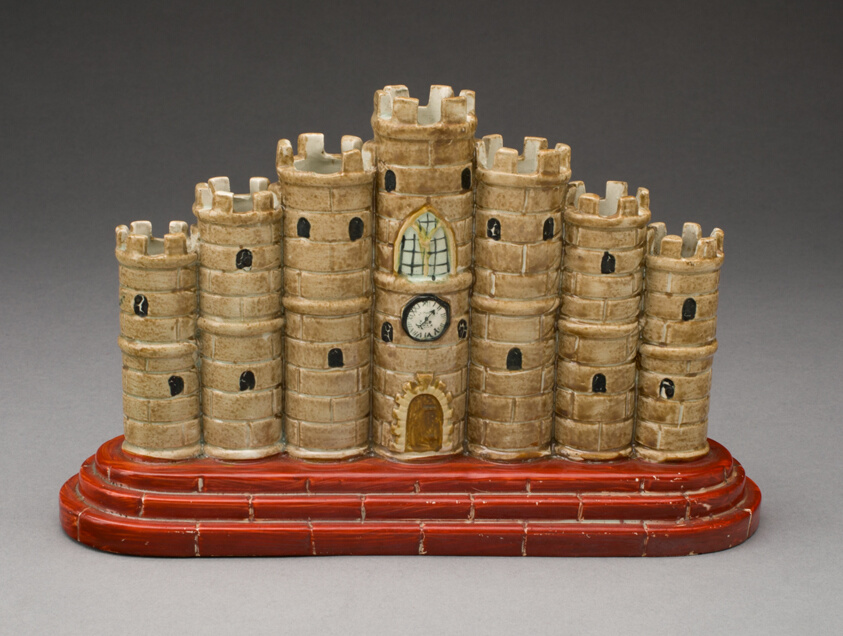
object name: Ceramics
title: Flower Holder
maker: England, Staffordshire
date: 1825/50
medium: Glazed earthenware with polychrome enamel decoration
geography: Staffordshire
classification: ceramics; european decorative arts